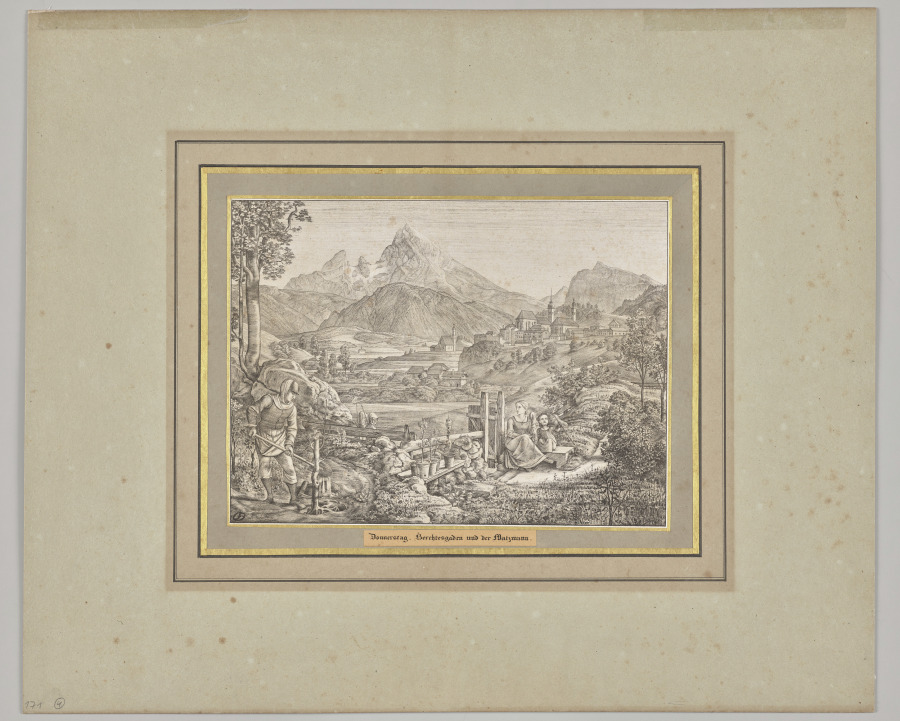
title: Thursday. Berchtesgaden and the Watzmann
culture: Germany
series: Seven Areas from Salzburg and Berchtesgaden. Arranged according to the seven days of the week, connected by two allegorical sheets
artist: Ferdinand Olivier (German, 1785–1841)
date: 1818–23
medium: lithograph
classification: Print